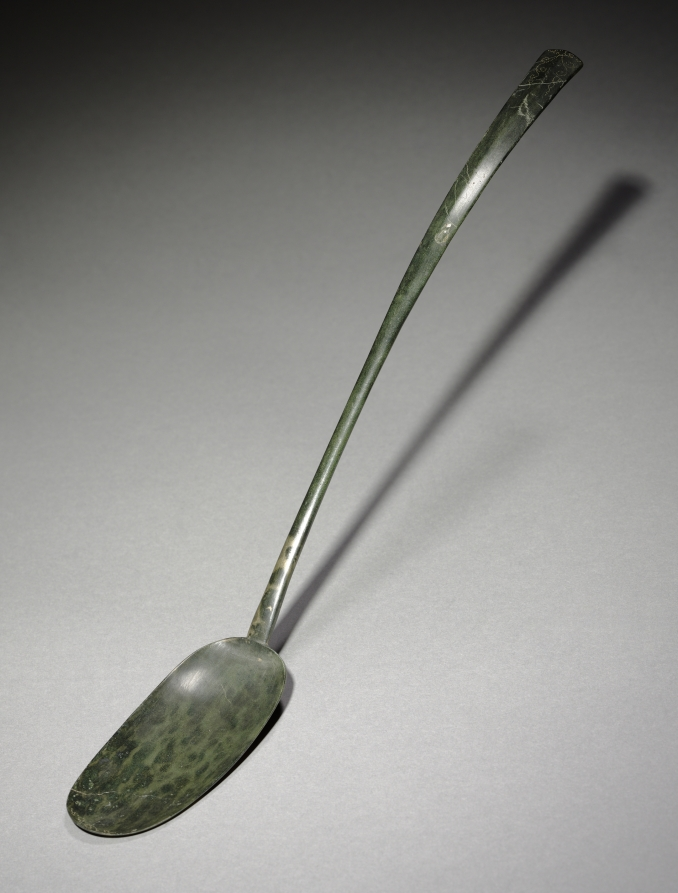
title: Spoon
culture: Korea, Goryeo dynasty (918–1392)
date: 918–1392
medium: bronze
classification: Metalwork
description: Celadons, spoons, seals, and bronze mirrors were the most common burial objects in tombs during the Goryeo period (918–1392). Furnishing tombs with an elaborate assemblage of objects was believed to honor and comfort the newly dead. Generally, Goryeo tombs were left untouched until the late 19th century. During the colonial period (1910–45), however, Japanese archaeologists hastily excavated the tombs located in Kaeseong, the former capital of the Goryeo period. Scholars recently have proposed that toward the end of the 14th century, Koreans enjoyed meat-based soups more than any other dishes, explaining why many more spoons than chopsticks were buried in tombs.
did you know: Bronze spoons are the most common burial item. Scholars have proposed that toward the end of the 14th century, Koreans enjoyed meat-based soups more than any other dishes, explaining why spoons became common household items as well as burial goods.